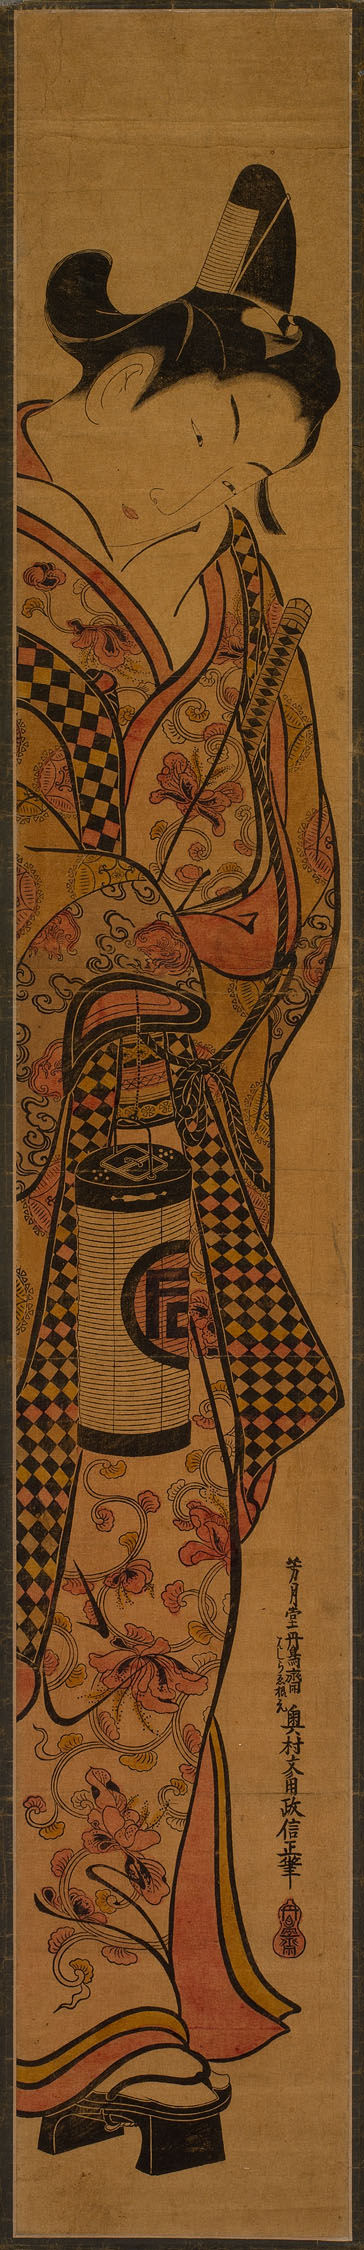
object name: Print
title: The Actor Sanogawa Ichimatsu I Holding a Lantern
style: Japanese (culture or style)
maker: Okumura Masanobu (Japanese, 1686-1764)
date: c. 1749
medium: Color woodblock print; wide hashira-e, urushi-e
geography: Japan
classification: woodblock print; print; asian art